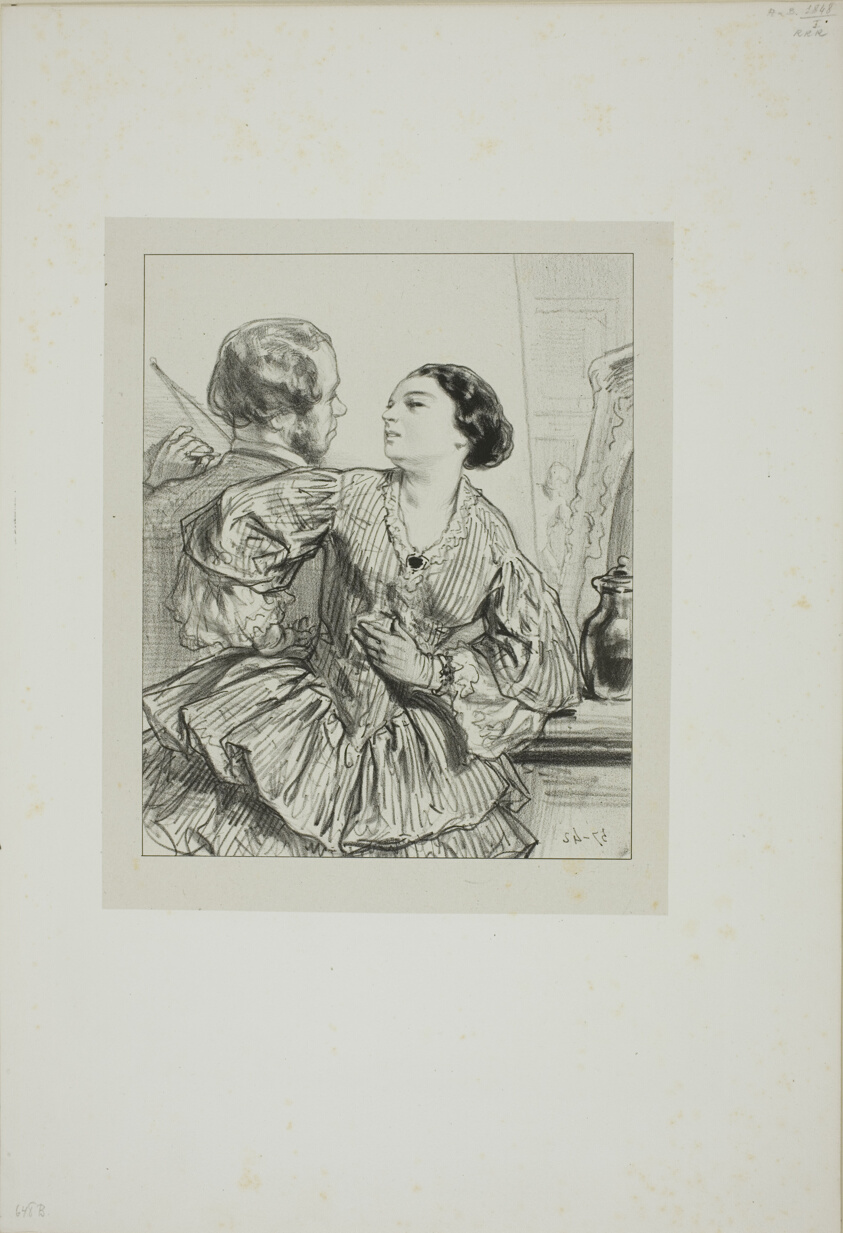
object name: Print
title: Masks and faces: I have been slandered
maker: Paul Gavarni (French, 1804-1866)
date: 1857–58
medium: Lithograph in black on light gray China paper, laid down on ivory wove paper (paper collé)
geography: France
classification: lithograph; print; prints and drawing